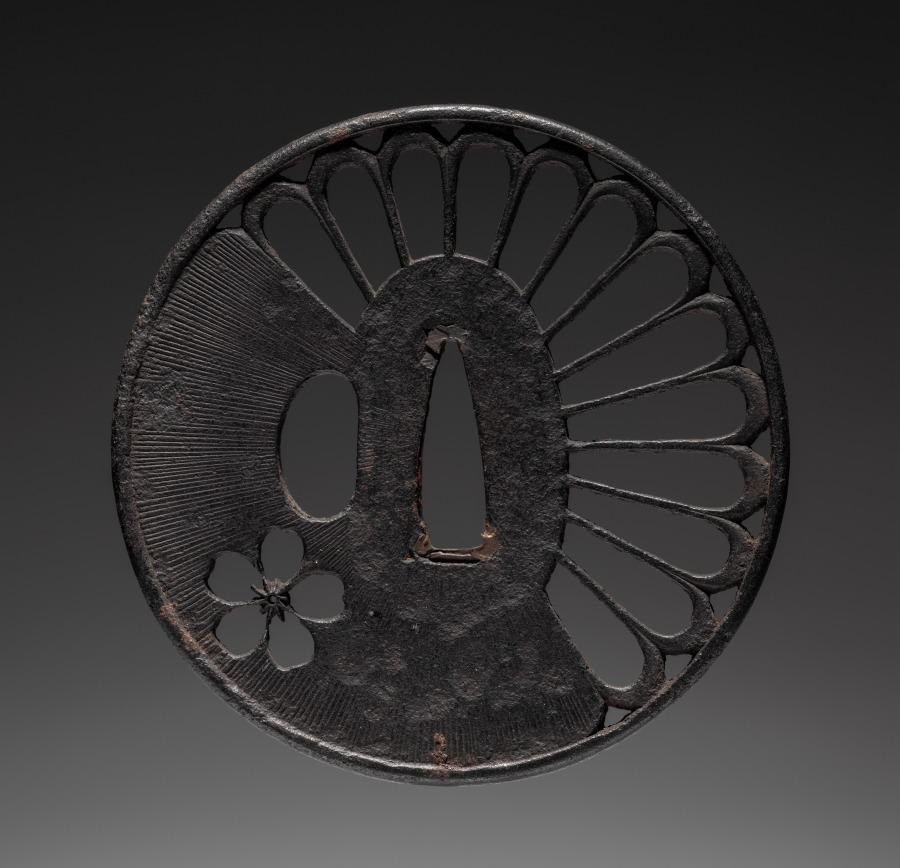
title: Sword Guard (Tsuba)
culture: Japan, Edo period (1615–1868)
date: 1615–1868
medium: iron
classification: Arms and Armor